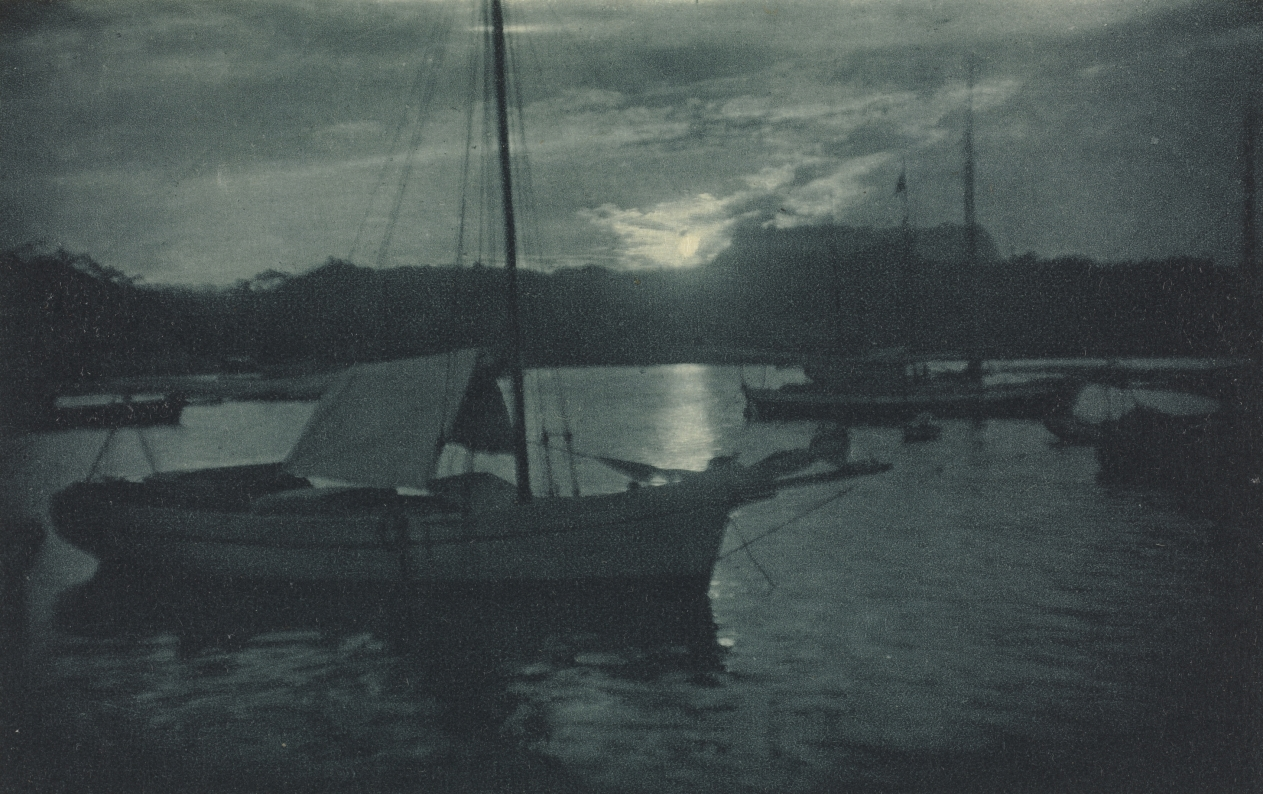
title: Camera Work: The Last Hour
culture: America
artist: Joseph T. Keiley (American, 1969–1914)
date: 1907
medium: photogravure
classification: Bound Volume